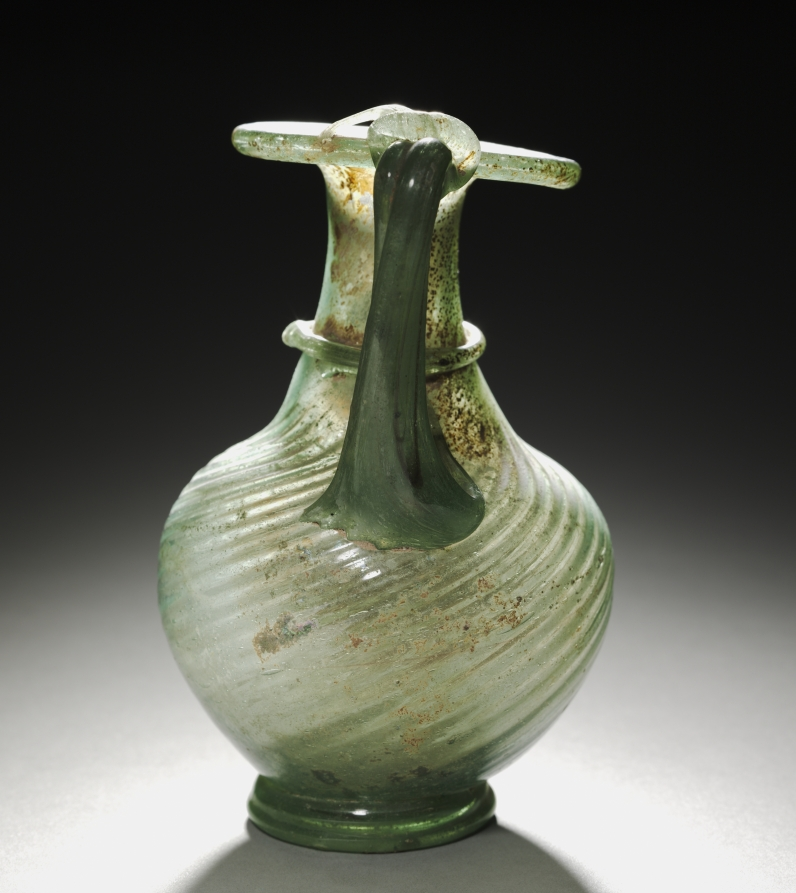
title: Pitcher with Handle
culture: Eastern Mediterranean, Roman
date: 300s CE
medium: glass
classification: Glass